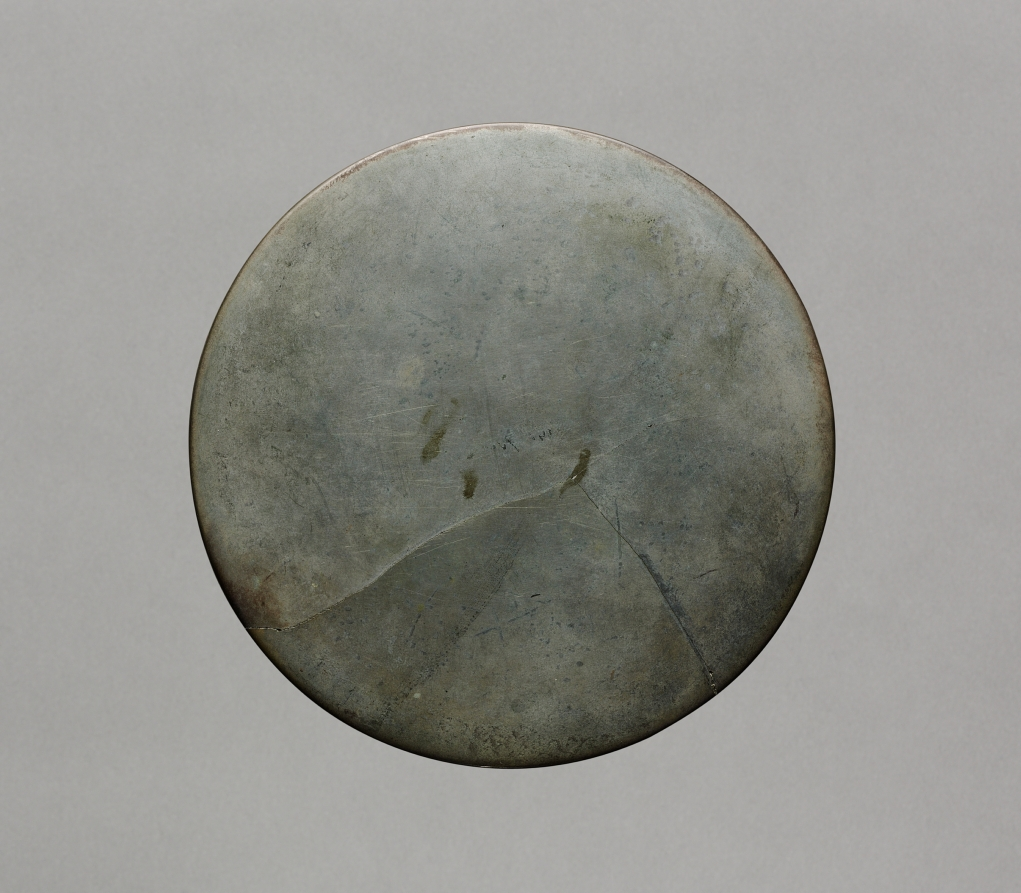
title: Mirror with Pair of Birds in Chrysanthemum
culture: Japan, Muromachi period (1392–1573)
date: 1392–1573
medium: bronze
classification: Metalwork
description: The Japanese used chrysanthemums as decorative elements on mirrors. In the Heian period, a chrysanthemum with cranes or long-tailed birds was a common motif. Later, in the Kamakura and Muromachi periods, chrysanthemum designs were divided into three patterns with different symbolic associations: Chrysanthemum with Cranes represented longevity; Water Flowing suggested longevity as well as the Noh drama Kikujido, or Chrysanthemum Boy; and East Fence alluded to the poem "Drinking Wine" by Tao Yuanming (AD 365–427). Here, the mirror featuring Buddhist iconography (kyojo) and a chrysanthemum design on the back shows that the flower was also appreciated in the context of Buddhism in the Kamakura period.